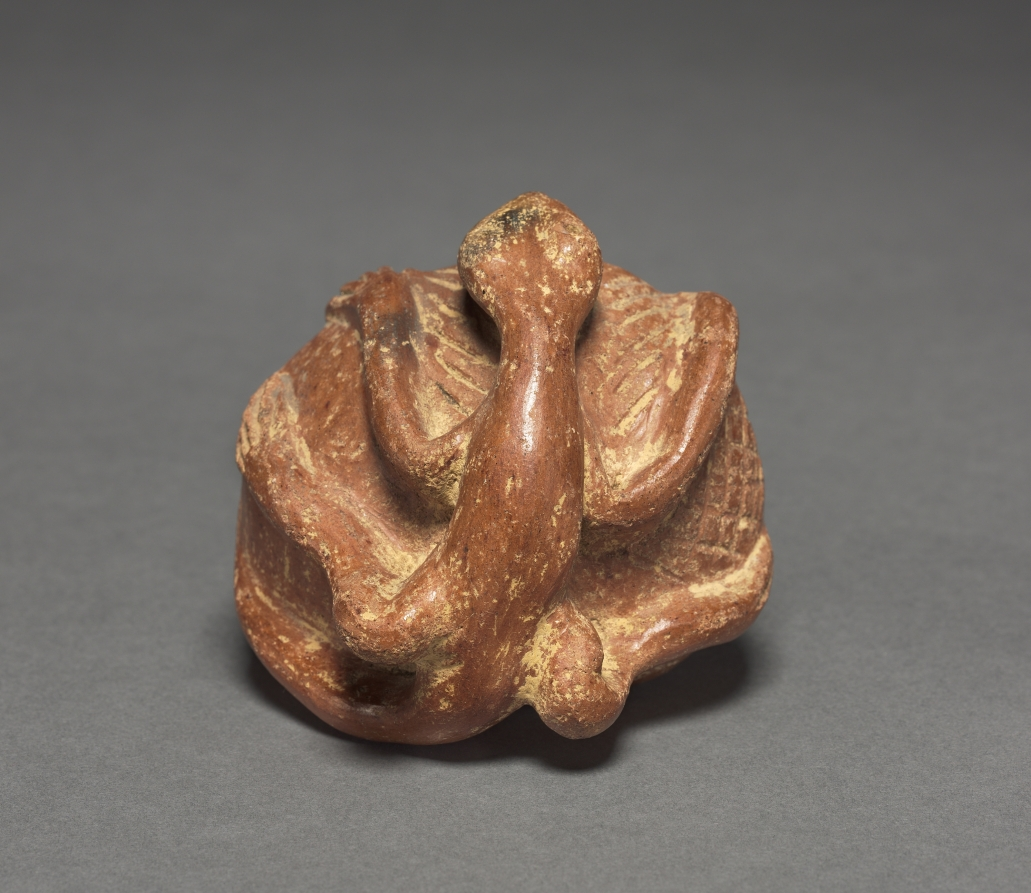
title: Chameleon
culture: Colombia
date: before 1921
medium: red ware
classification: Ceramic